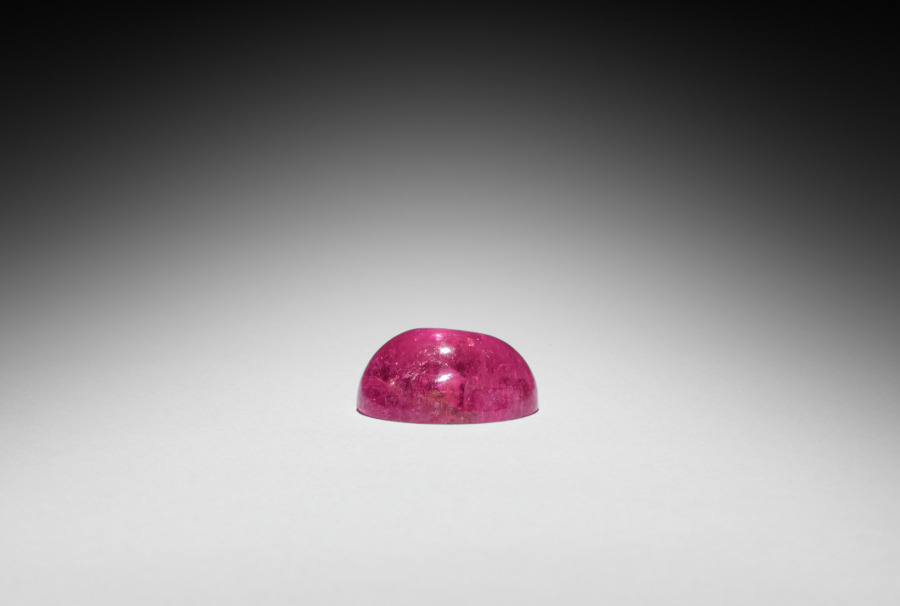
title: Snuff Bottle with Stopper (stopper)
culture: China, Qing dynasty (1644-1911)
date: 1800s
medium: rose quartz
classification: Jade